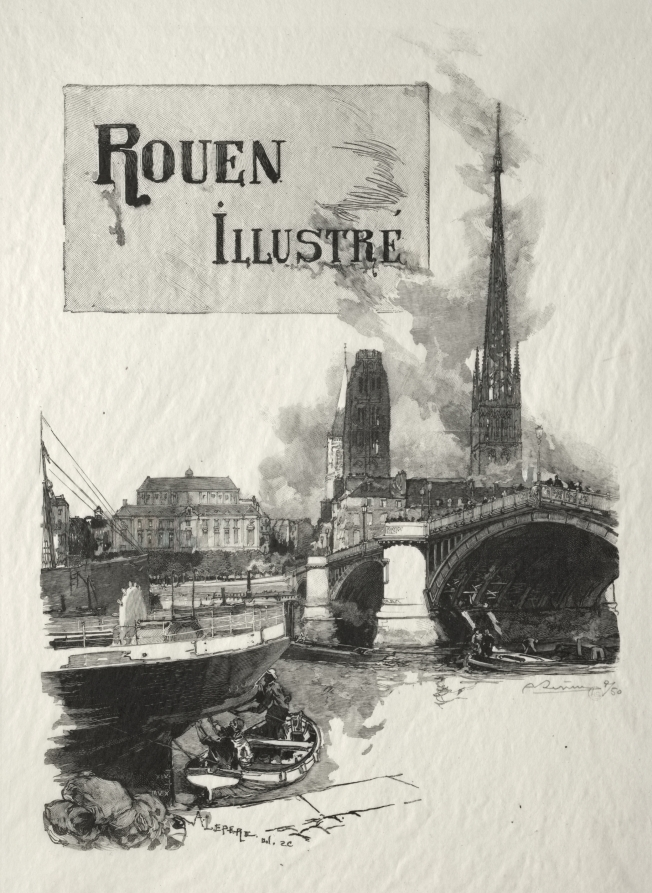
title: Frontispiece de Rouen Illustré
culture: France, 19th century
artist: Auguste Louis Lepère (French, 1849–1918)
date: 1896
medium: wood engraving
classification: Print